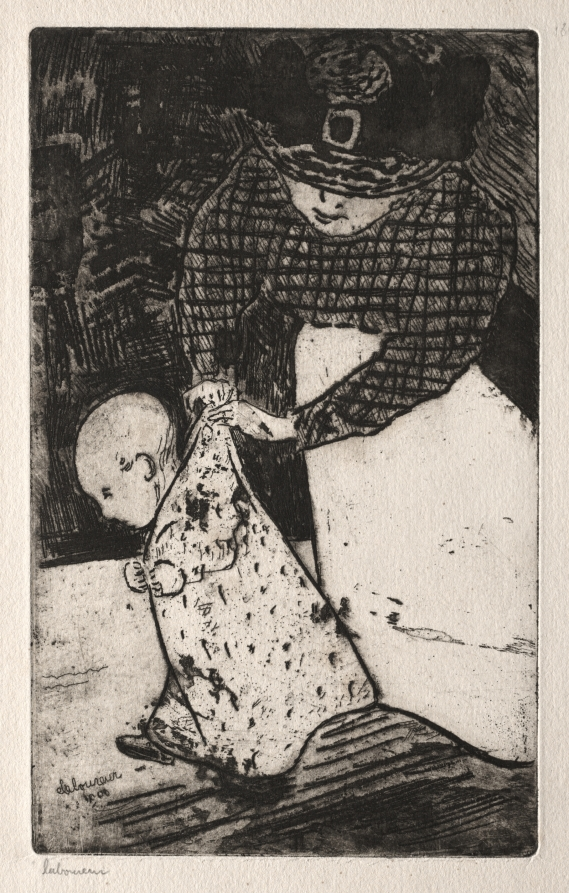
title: The Nursery Maid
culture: France, 20th century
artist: Jean-Émile Laboureur (French, 1877–1943)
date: 1900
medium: etching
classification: Print